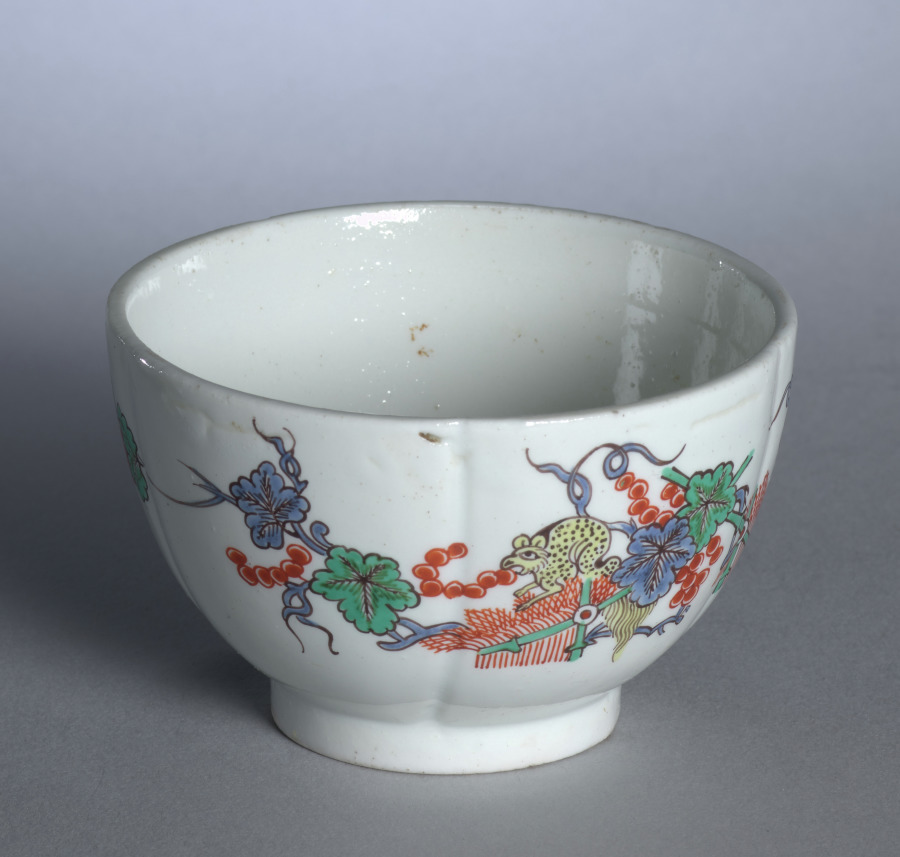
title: Sugar Bowl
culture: France, Chantilly, 18th century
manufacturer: Chantilly Porcelain Factory (French)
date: c. 1730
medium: soft-paste porcelain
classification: Ceramic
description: The pieces composing this individual tea set are entirely typical of Chantilly soft-paste porcelain in the Kakiemon style. Both the form and decoration of these pieces were inspired by Japanese prototypes. The use of knobs in the form of trumpet-shaped blossoms is characteristic of Chantilly wares.